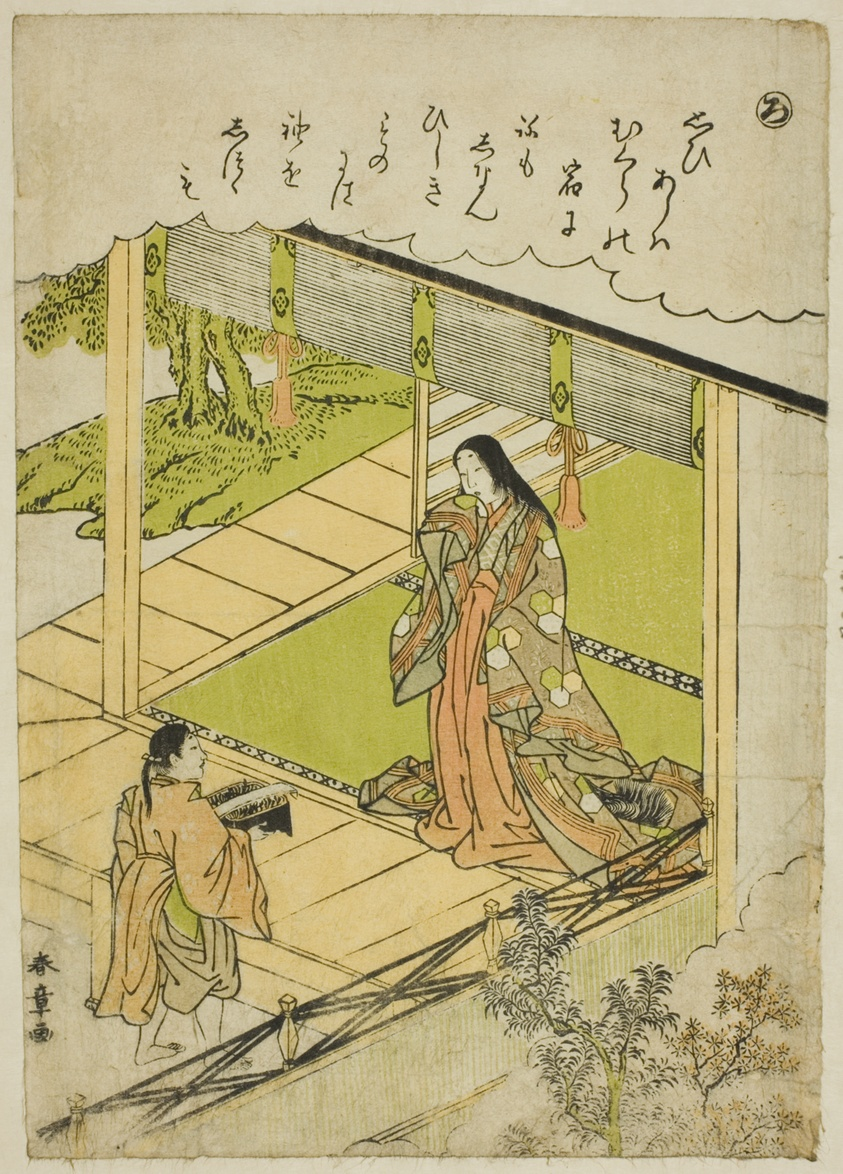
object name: Print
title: "Ro": Seaweed, from the series "Tales of Ise in Fashionable Brocade Pictures (Furyu nishiki-e Ise monogatari)"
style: Japanese (culture or style)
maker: Katsukawa Shunsho 勝川 春章; Japanese, 1726-1792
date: c. 1772/73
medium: Color woodblock print; koban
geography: Japan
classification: woodblock print; print; asian art